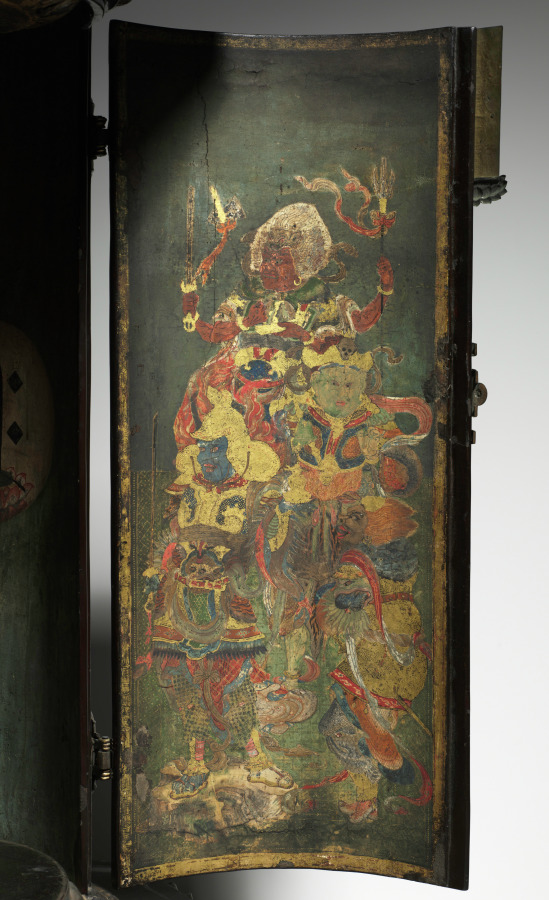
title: Repository for the Great Perfection of Wisdom Sutra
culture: Japan, Heian period (794–1185)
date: late 1100s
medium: lacquered wood with ink, color, gold, cut gold, and metalwork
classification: Lacquer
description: This repository is one of a pair that once contained the scrolls of a religious text called the Great Perfection of Wisdom Sutra. Two discs painted on the back have the sacred syllables representing the Buddha Shakyamuni and the Buddha Amida. Eight of the 16 benevolent but fierce looking deities who protect the text appear on the doors.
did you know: The mate to this object is in the Nara National Museum in Japan.